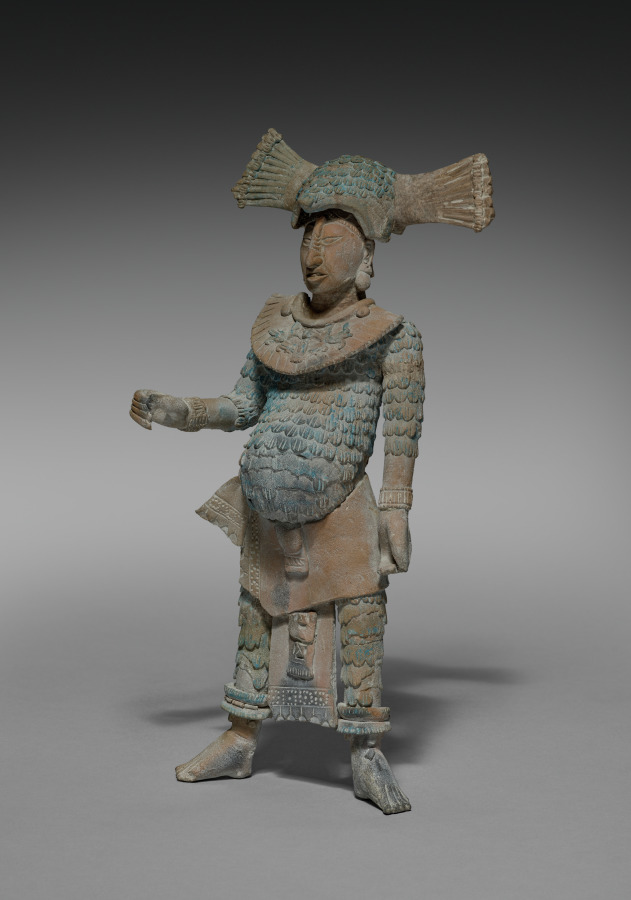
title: Warrior Figurine with Removable Headdress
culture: Mexico, Yucatán, Jaina Island region, Campeche, Maya style (250-900)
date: 600–900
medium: earthenware with pigment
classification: Sculpture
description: The major offerings placed in the Maya graves of Jaina Island were ceramic figurines, some of Mesoamerica's finest, that depict deities and humans in a variety of roles. This warrior, his headdress removable, once probably held weapons and wears either quilted cotton armor or the feathered uniform of a military order. We don't know why such figures are often pot-bellied.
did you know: Maya blue pigment was made by combining clay with indigo in a complex technique developed around the ninth century.